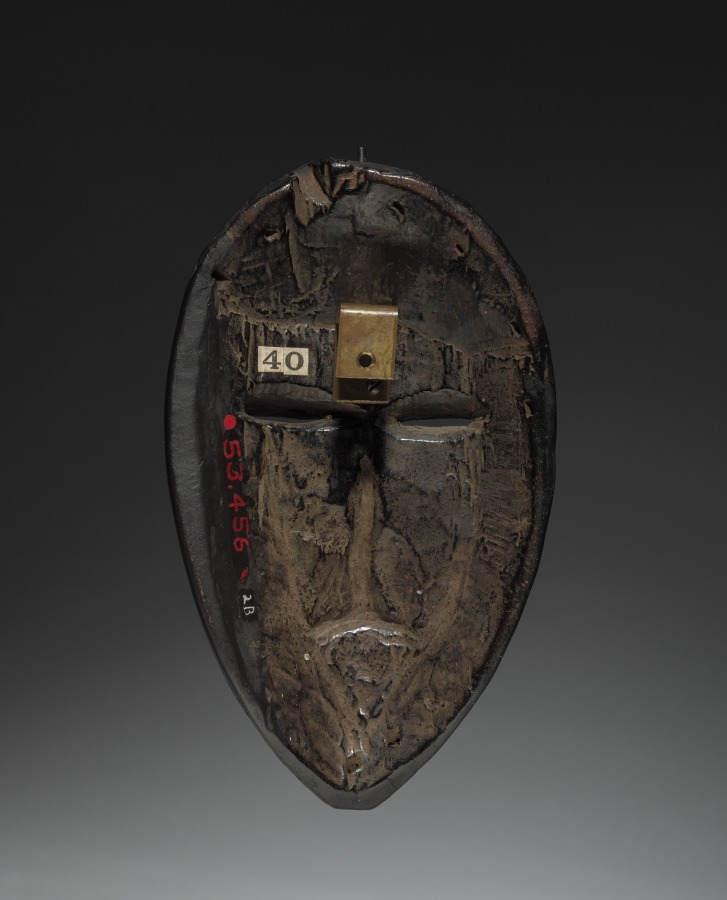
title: Mask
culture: Africa, West Africa, Liberia, Dan-style maker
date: c. 1900s?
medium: Wood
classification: Mask